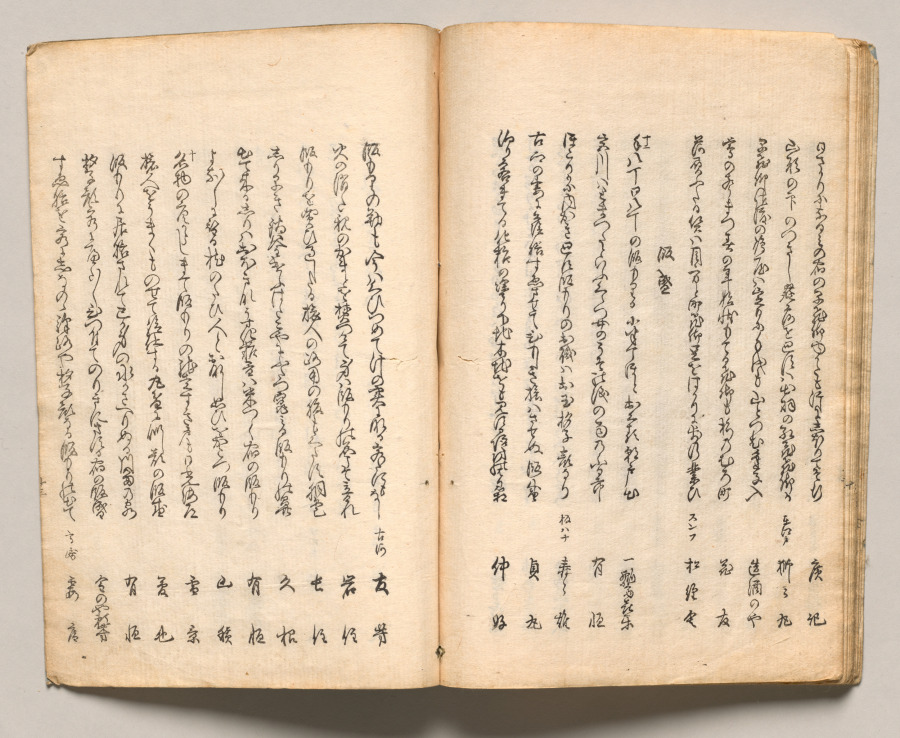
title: Spread Twenty from Volume Two of People of Japan in Light Verse (Kyōka)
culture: Japan, Edo period (1615–1868)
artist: Utagawa Hiroshige (Japanese, 1797–1858)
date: 1857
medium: Woodblock-printed book; ink and color on paper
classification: Bound Volume